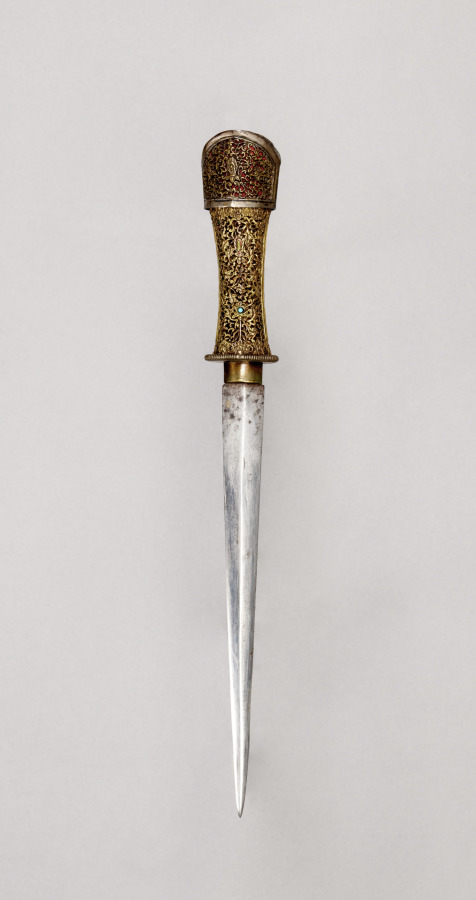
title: Dagger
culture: Northeast India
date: c. 1750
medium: brass with gilt grip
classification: Arms and Armor